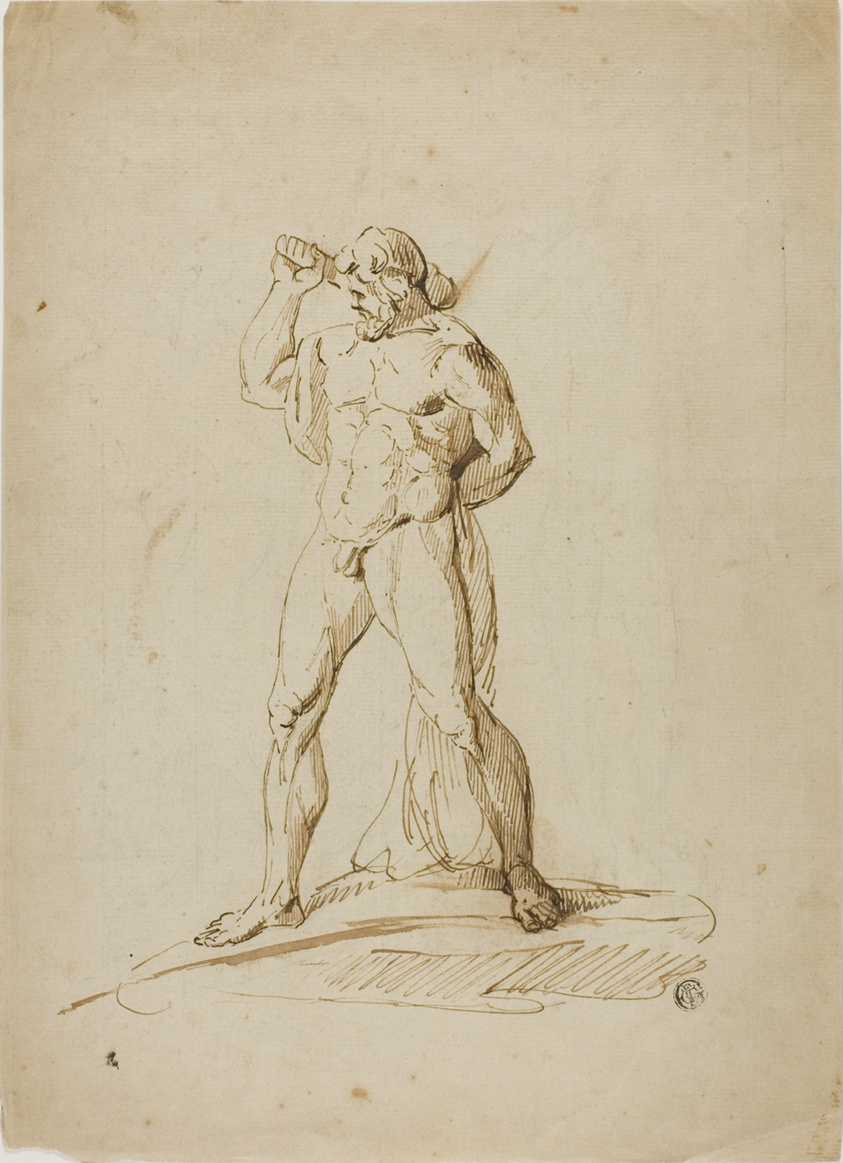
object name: Drawing and Watercolor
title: Hercules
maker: Unknown Artist; European, 1700-1799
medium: Pen and brown ink, with traces of black chalk, on cream laid paper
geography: Europe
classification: pen and ink drawings; drawings (visual works); prints and drawing